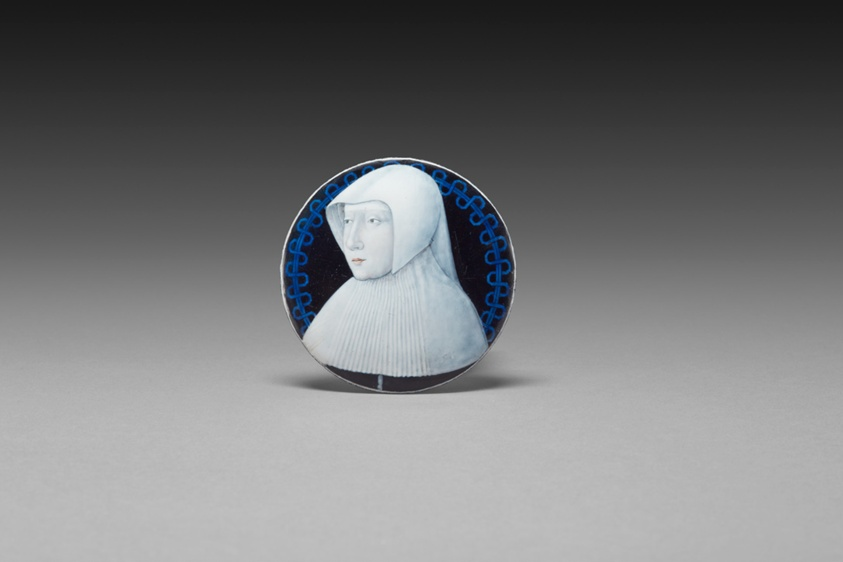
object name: Decorative Arts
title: Medallion, probably Margaret of Lorraine (recto); the Virgin Seated on a Throne Before Two Widows (verso)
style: Renaissance, 16th Century, limoges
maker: Attributed to Léonard Limosin (French, c. 1505–c. 1577)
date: c. 1530–c. 1540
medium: Painted enamel on copper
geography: Limoges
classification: limoges; enamel; european decorative arts; medallion; portrait; private devotion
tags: Virgin and child/Madonna and child, angels, five sorrows of the Virgin, Margaret of Lorraine, praying, private devotion